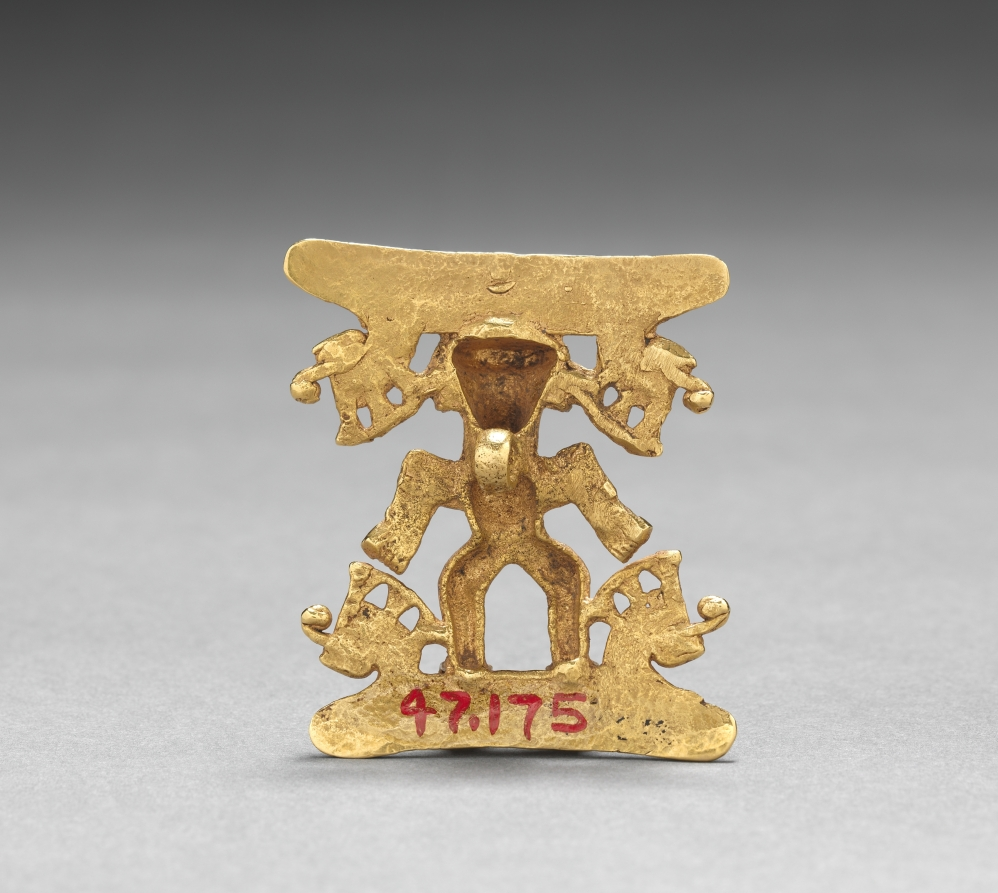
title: Figurine Pendant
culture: Western Panama, Veraguas-Gran Chiriquí Style, 8th-16th Century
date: c. 700–1550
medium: cast and hammered gold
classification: Metalwork